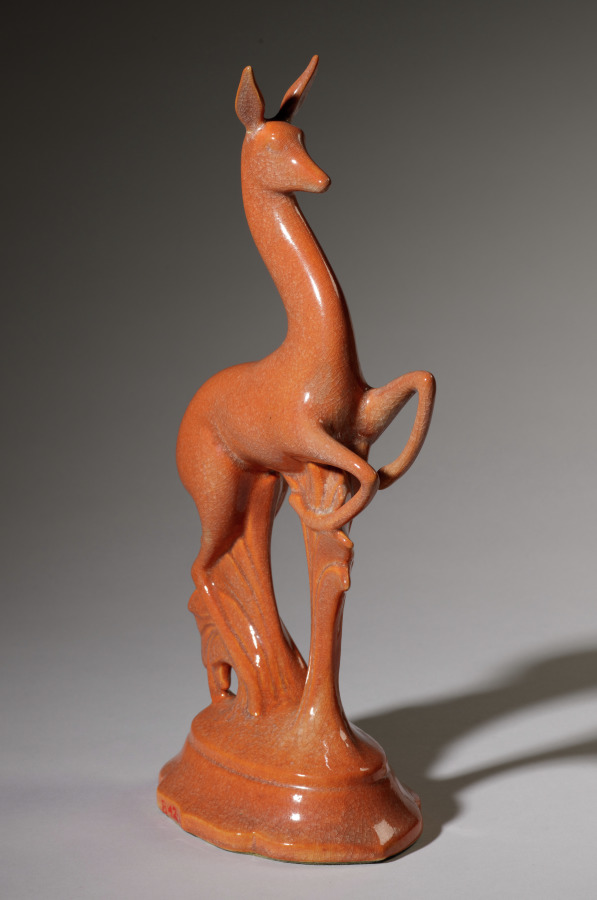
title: Fawn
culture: America, Ohio, Cleveland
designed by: Waylande Gregory (American, 1905–1971)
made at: Cowan Pottery Studio (America, Ohio, Rocky River, 1920–1931)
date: 1929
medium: earthenware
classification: Ceramic